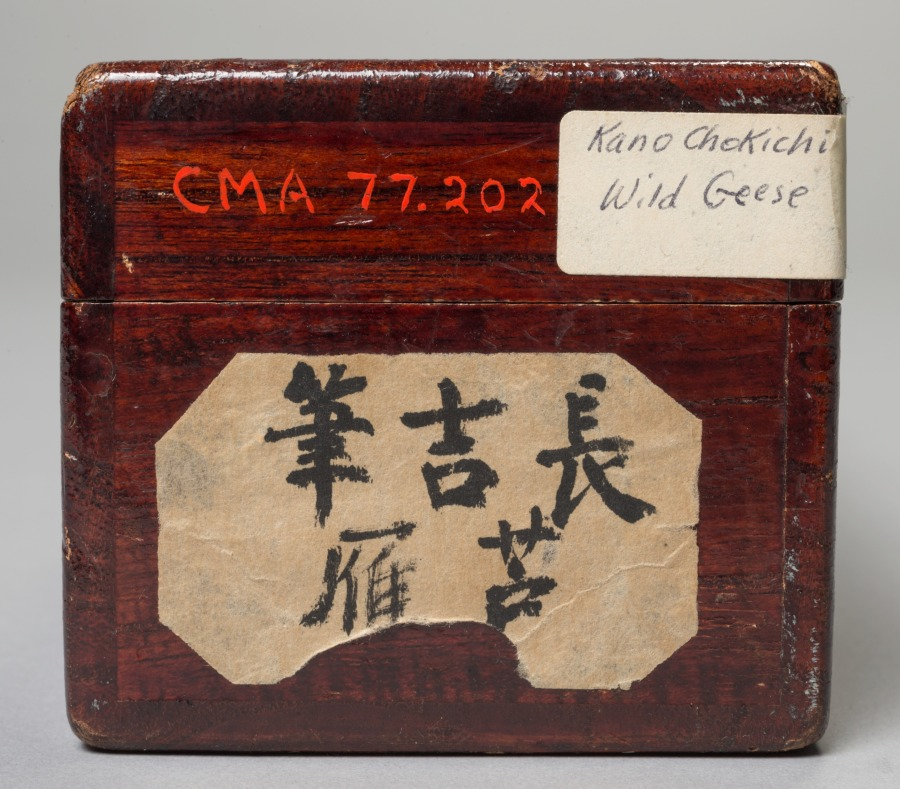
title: Wild Geese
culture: Japan, Muromachi period (1392–1573)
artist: Chōkichi (Japanese)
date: early 1500s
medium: hanging scroll; ink on paper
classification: Painting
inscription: Gourd-shaped seal of Chokichi at lower left